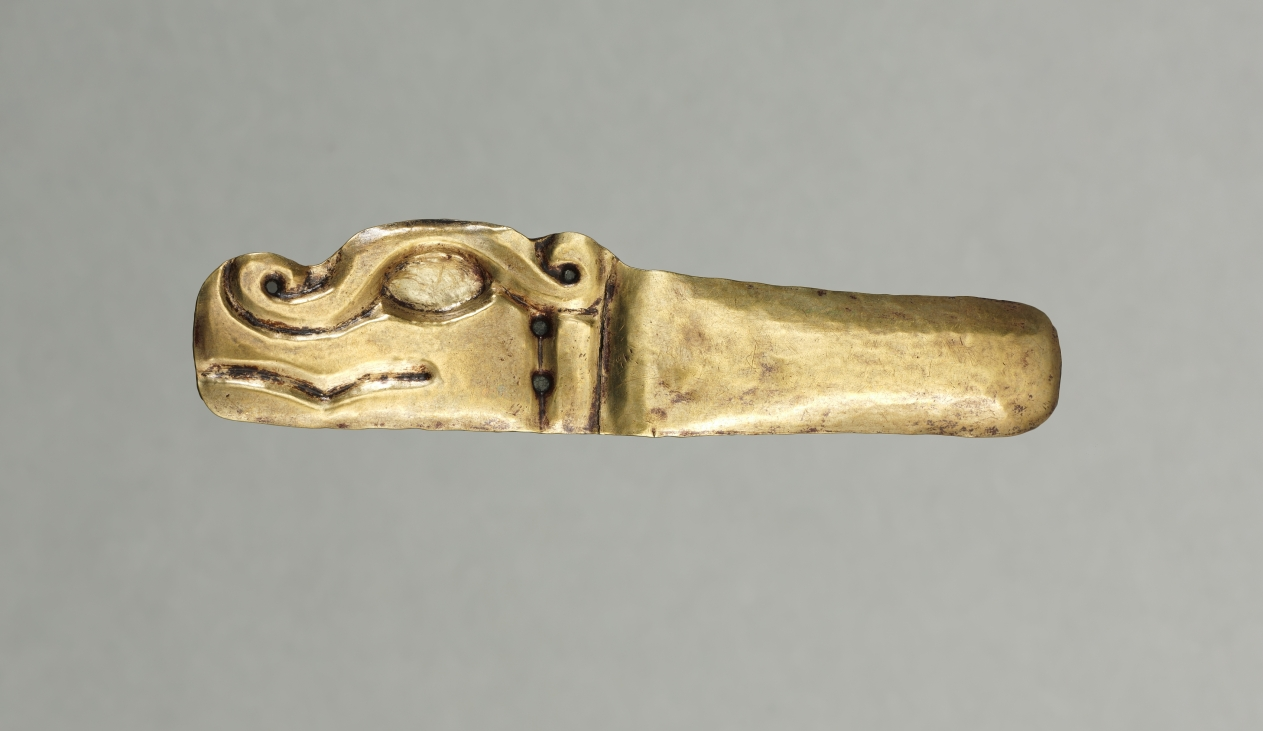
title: Spoon(?)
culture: Peru, North Highlands, Chavín de Huantar(?), Chavín style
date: c. 500–200 BCE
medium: hammered and cut gold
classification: Metalwork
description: There seems to be a link between Chavín religion and appearance of the Andes’ first large precious-metal objects, made using revolutionary new metallurgical processes. Chavín may have developed these technical innovations to express the inexpressible, the "wholly other" nature of its religion. In many areas, elite men and women wore the ornaments as emblems of their ties to this religion, and eventually were buried with them. These 16 objects, along with three others not in the museum’s collection, are said to have come as a group from Chavín itself.